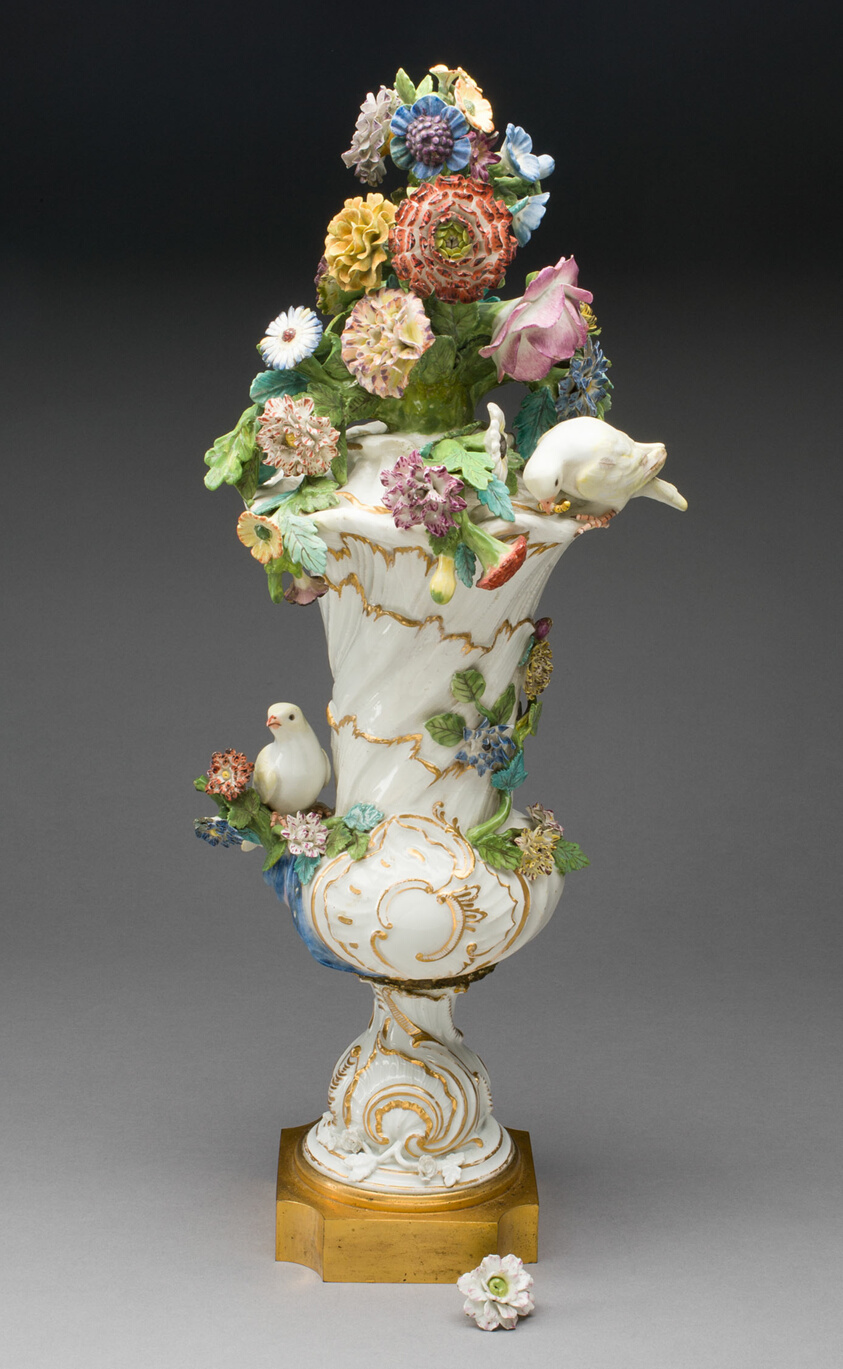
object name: Ceramics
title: Vase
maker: Meissen Porcelain Manufactory (German, founded 1710)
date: c. 1750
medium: Hard-paste porcelain, polychrome enamels, gilding, and gilt bronze mounts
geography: Meissen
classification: vase; porcelain; vessel; european decorative arts; ceramics